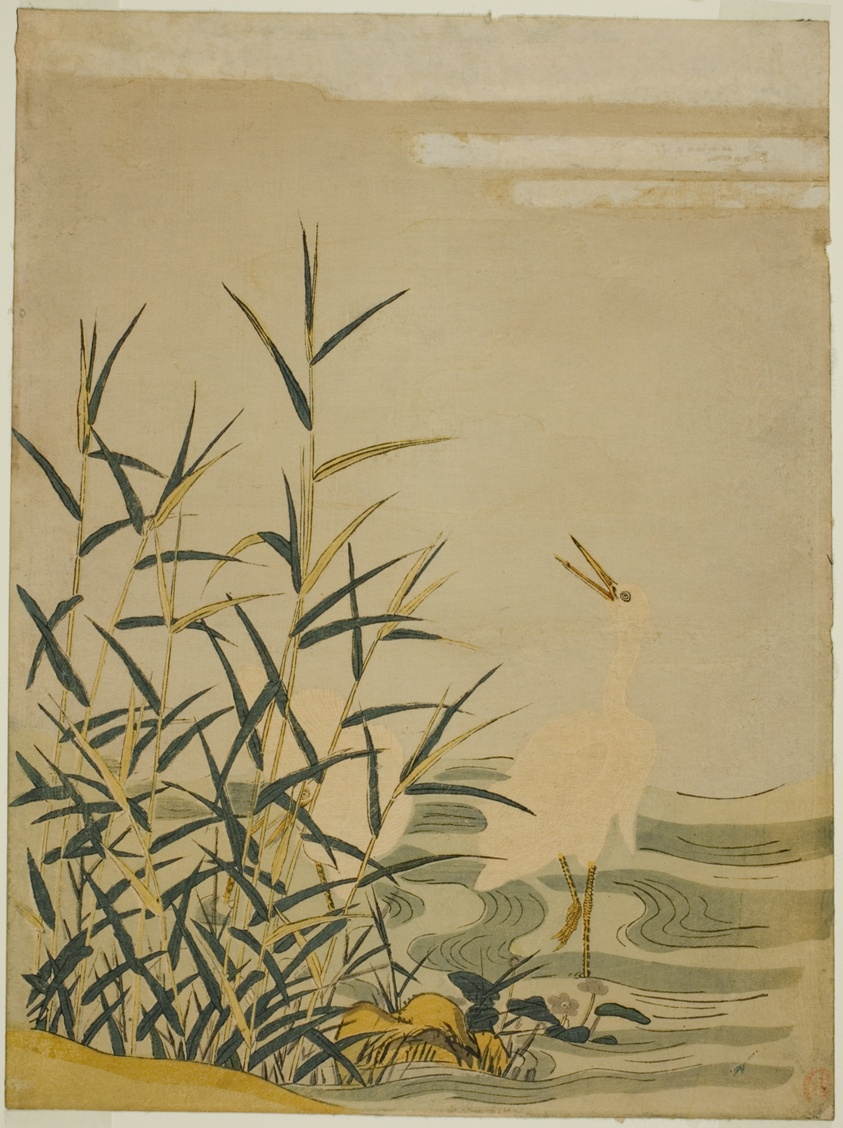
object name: Print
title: Egrets in the Reeds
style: Japanese (culture or style)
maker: Attributed to Isoda Koryusai; Japanese, 1735-1790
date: c. 1774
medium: Color woodblock print; chuban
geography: Japan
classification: woodblock print; print; asian art